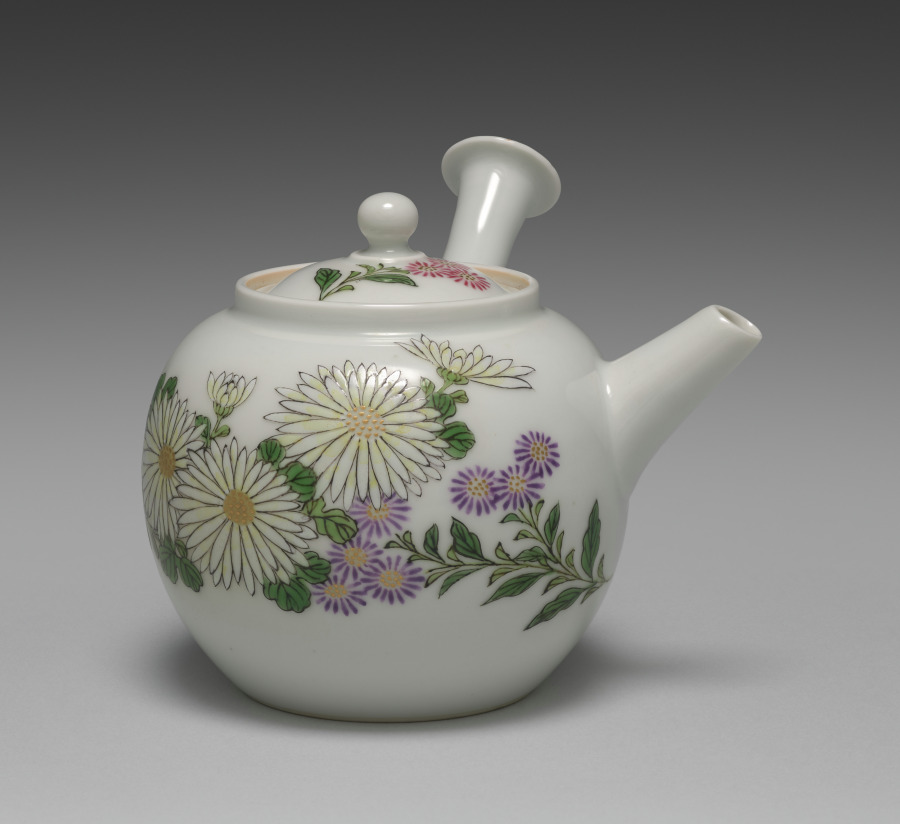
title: Teapot with Chrysanthemums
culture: Japan, Meiji period (1868–1912)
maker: Seifū Yohei III (Japanese, 1851–1914)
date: 1912–14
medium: Porcelian with overglaze enamel and gold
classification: Ceramic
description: This teapot with recessed lid has a bold, realistic design of pale yellow and white chrysanthemums rendered in overglaze color enamels and dotted gold centers. Black contour lines define the yellow and white flowers and their green stems and leaves. Small pink and purple chrysanthemums are rendered as simple motifs, their shapes defined in contrast to the white ground of the pot.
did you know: This side-handled teapot is designed for brewing and serving sencha.